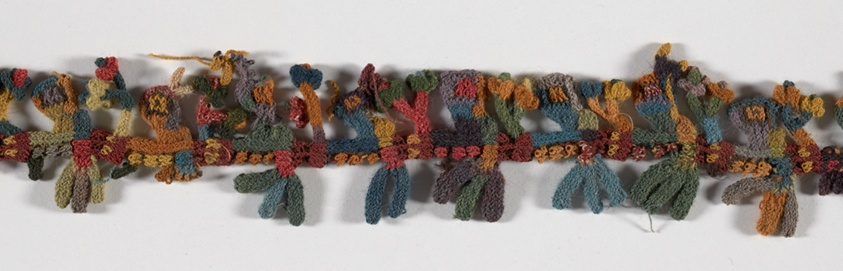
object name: Textile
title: Border Fragment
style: nazca, andean, andes, Pre-Columbian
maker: Nazca; South coast, Peru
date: 100 B.C./A.D. 200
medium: Wool (camelid), tubular cross-knit looping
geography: Peru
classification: textile; weaving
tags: super/natural